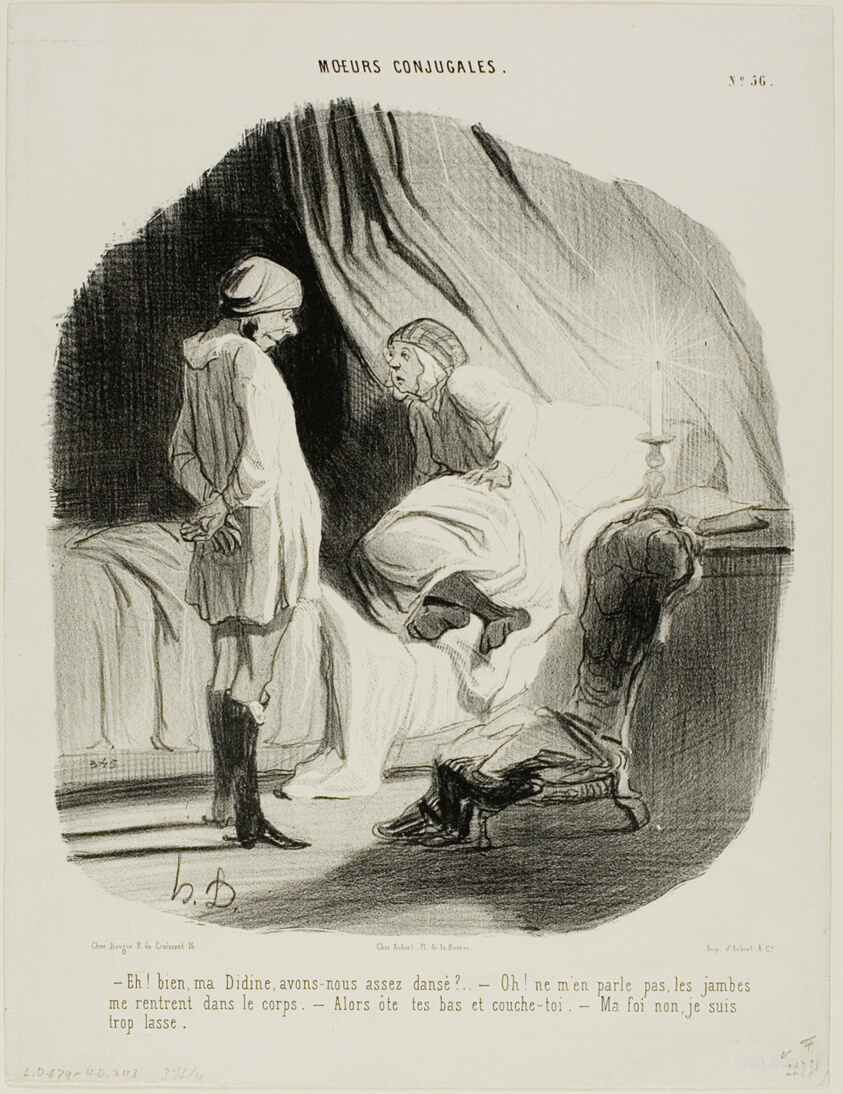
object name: Print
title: “- Eh! my Didine, have we danced enough? - Oh, don't mention it any more, I am completely worn out - Then take off your stockings and get to bed! - Good grief, no.. really, I'm just too tired!,” plate 56 from Moeurs Conjugales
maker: Honoré Victorin Daumier; French, 1808-1879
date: 1842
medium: Lithograph in black on white wove paper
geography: France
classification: lithograph; print; prints and drawing